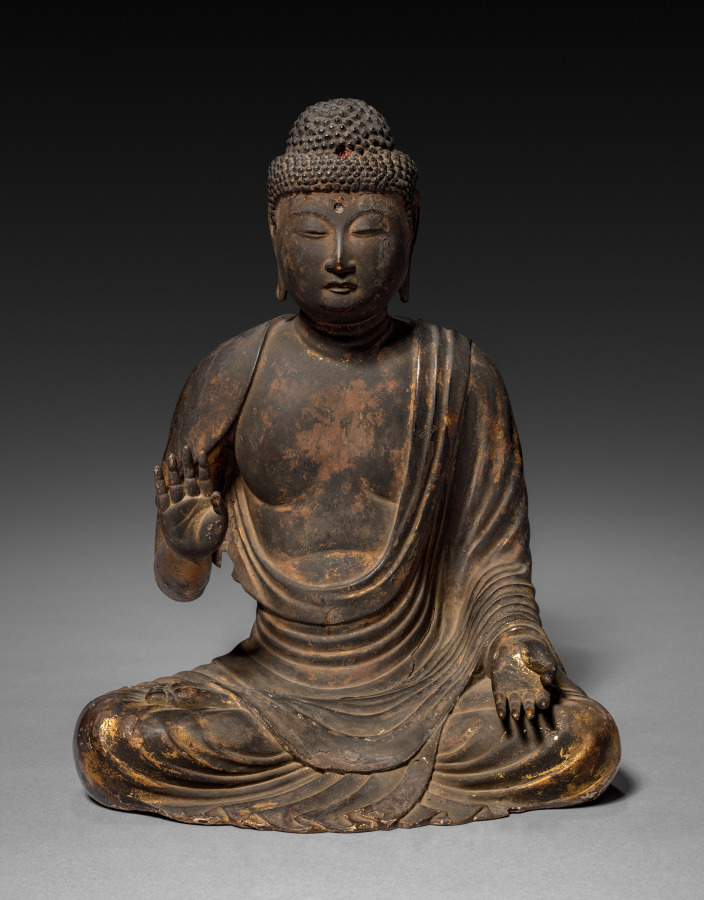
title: Shakyamuni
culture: Japan, Meiji period (1868–1912)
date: c. 1868–1912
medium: Wood with traces of lacquer and gilding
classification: Sculpture